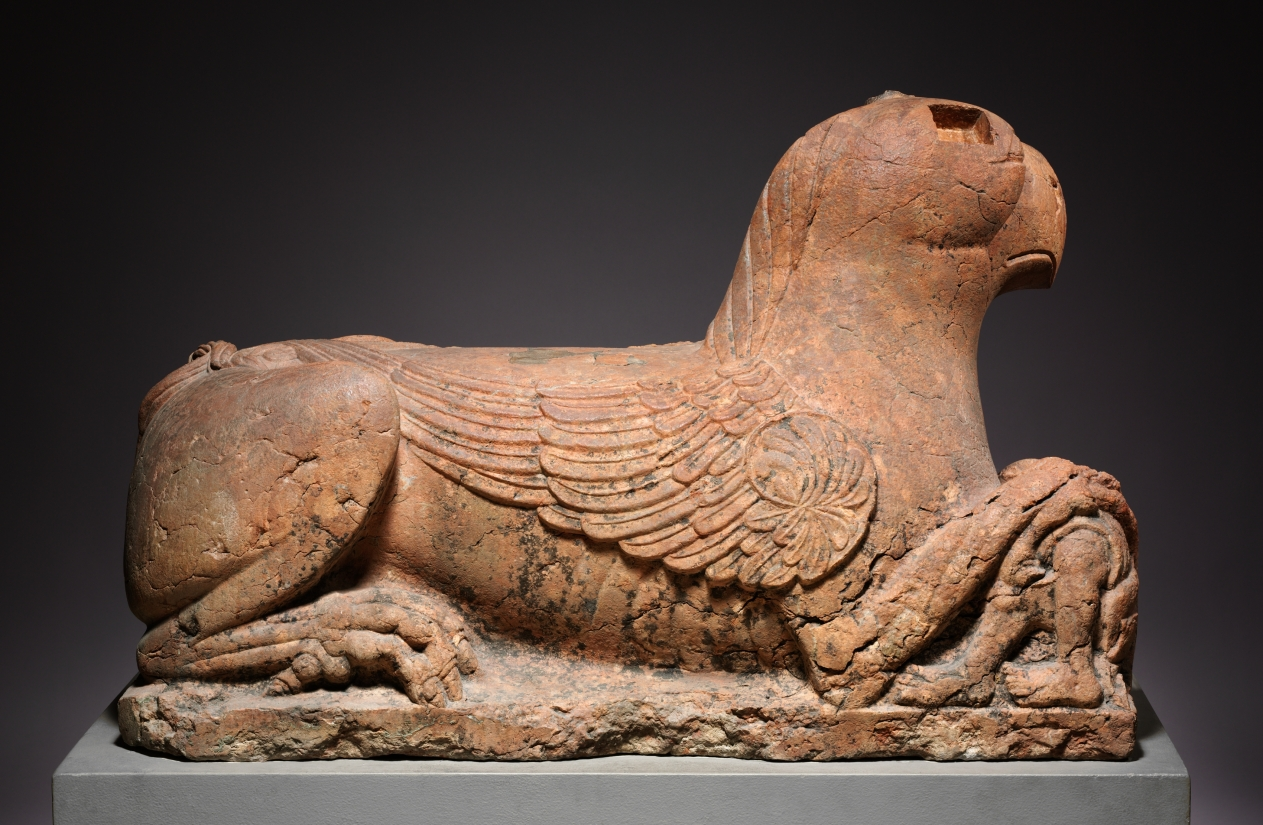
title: Guardian Griffin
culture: Northern Italy, Emilia, 12th century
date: 1150–1175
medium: pink limestone (called "Verona Marble")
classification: Sculpture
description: Griffins are fabled creatures that have the characteristics of an eagle and a lion--combining watchfulness and courage. In Christian art, the dual nature of the griffin was often used to signify that of Christ himself: divine (bird) and human (animal). Griffins were often used as guardian figures in church sculpture and were placed in portals and choir screens. The creatures seen here, with their inward-turning heads, were certainly used for such a purpose. When viewed from the front, one griffin may be seen protecting the figure of a knight between its paws, while the other griffin guards a calf. Their original function was probably to support the columns of a porch in front of a church doorway.